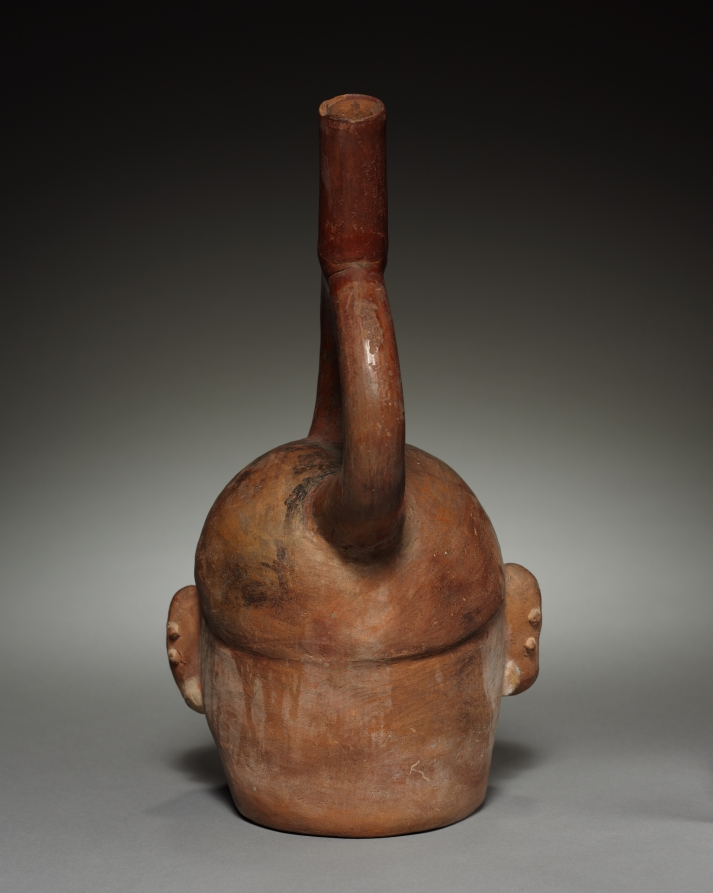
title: Bottle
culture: Peru, Mochica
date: before 1930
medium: pottery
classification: Ceramic